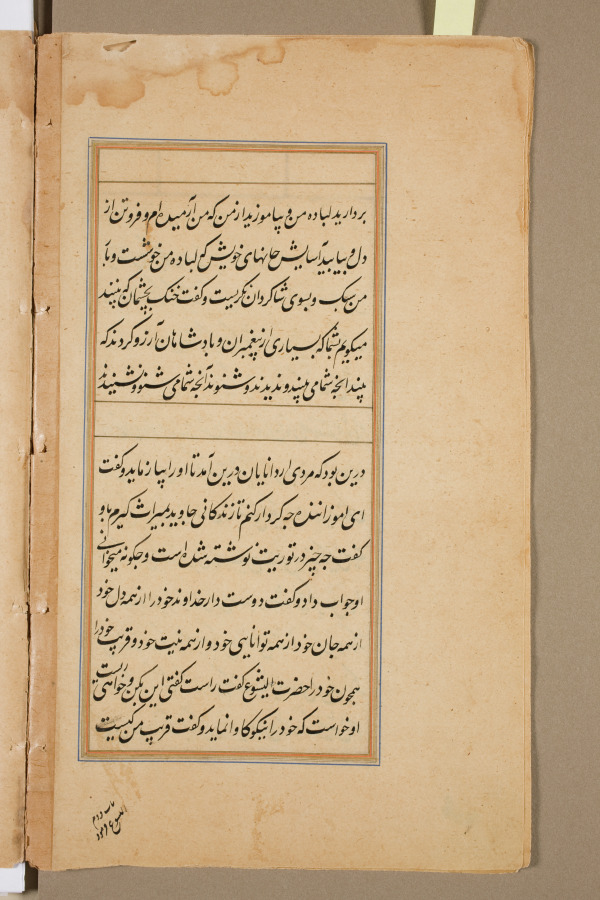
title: Text page from a Mirror of Holiness (Mir’at al-quds) of Father Jerome Xavier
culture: Mughal India, Allahabad, made for Prince Salim (1569–1627)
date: 1602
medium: Ink and gold on paper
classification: Manuscript